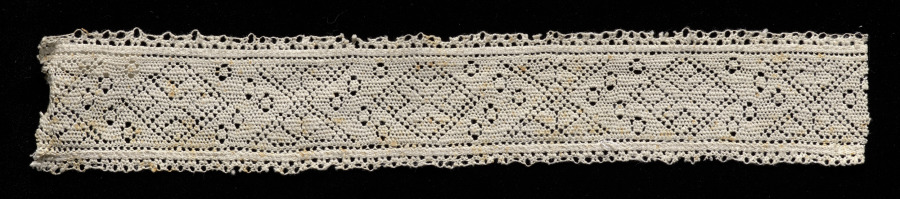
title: Lace Fragment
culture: Italy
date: 1600s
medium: Needle lace (Punto Avorio or Ivory Stitch) insertion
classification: Lace